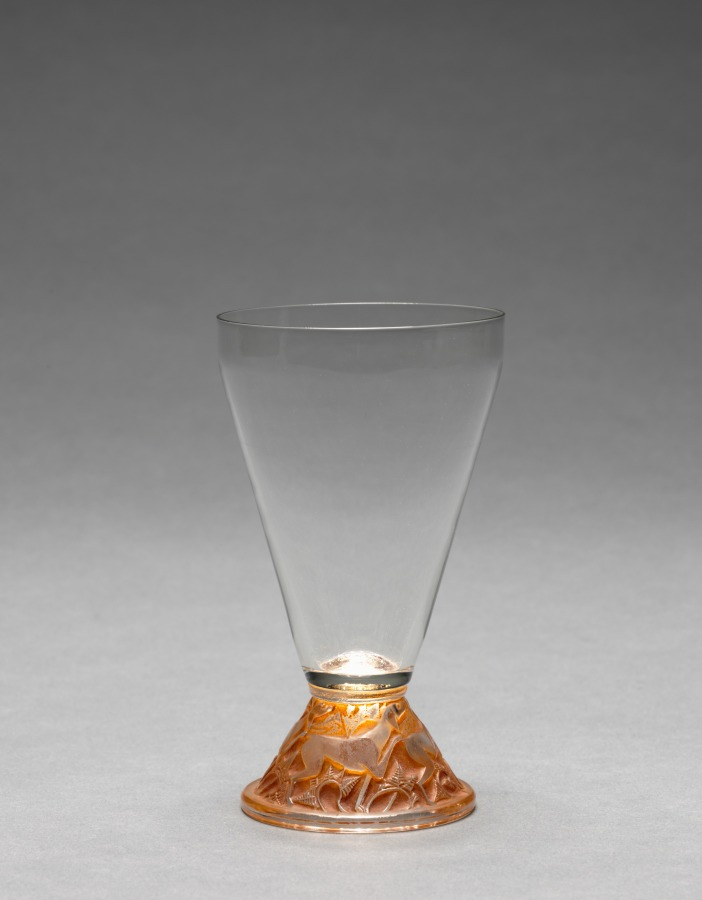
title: Hunting Dogs Footed White Wine Glass (Verre à pied, chasse chiens)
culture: France, 20th century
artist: René Lalique (French, 1860–1945)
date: c. 1913–21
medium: glass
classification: Glass